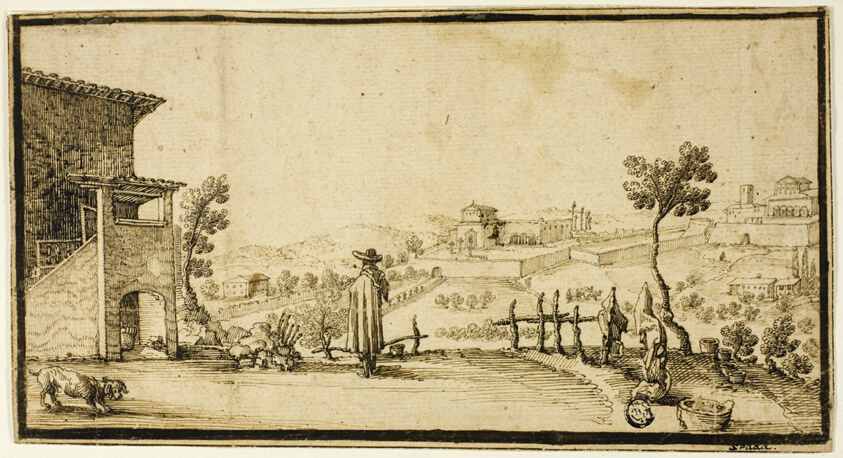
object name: Drawing and Watercolor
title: View of San Miniato and San Francesco al Monte Outside Florence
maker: Valerio Spada (Italian, 1613-1688)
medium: Pen and brown ink, over traces of graphite, on tan laid paper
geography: Italy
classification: pen and ink drawings; drawings (visual works); prints and drawing